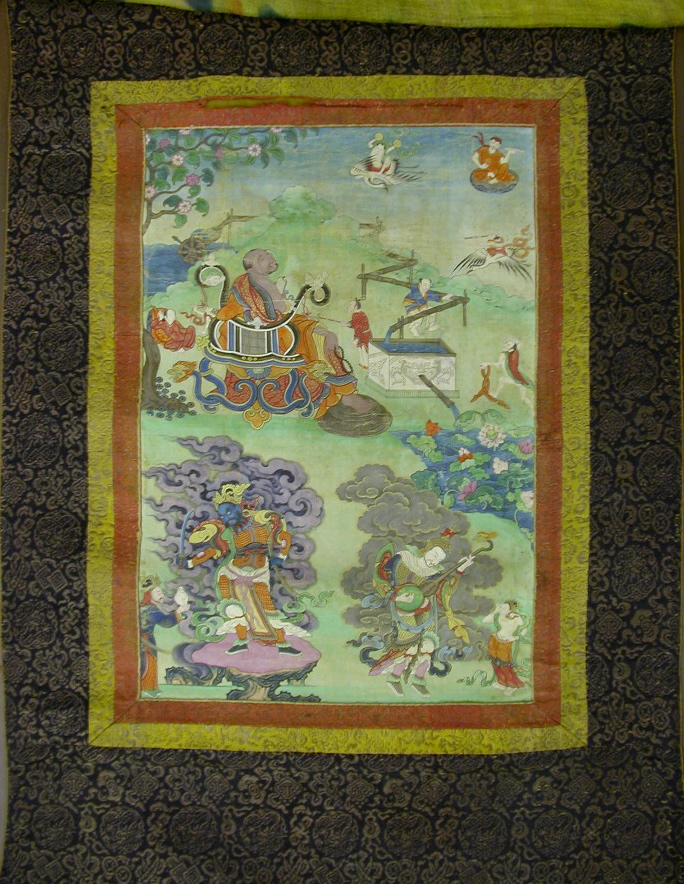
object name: Painting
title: Painted Banner (Thangka) from a Set of Seven Honoring Gayadhara, a Pandit from India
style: Himalayan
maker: Tibet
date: 19th century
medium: Pigment on cloth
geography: Tibet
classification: hanging scroll; asian art; painting